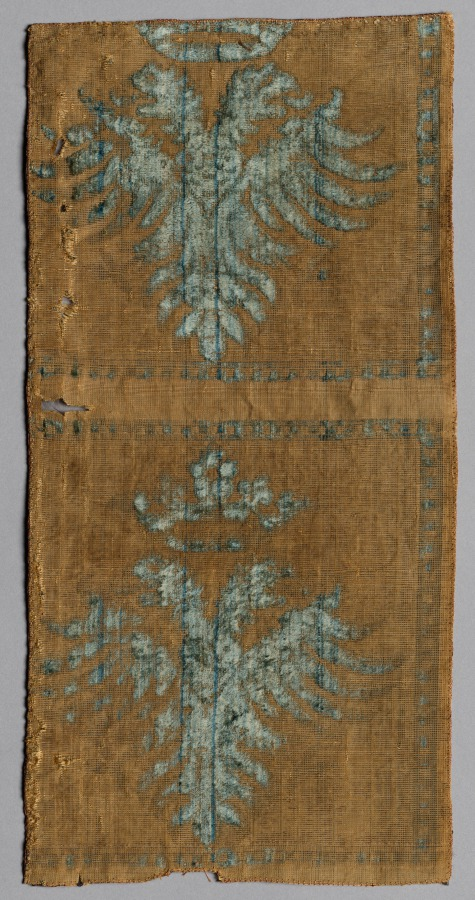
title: Velvet Fragment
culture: Italy, 15th century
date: 1400s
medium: velvet (cut and voided); silk and metal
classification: Velvet